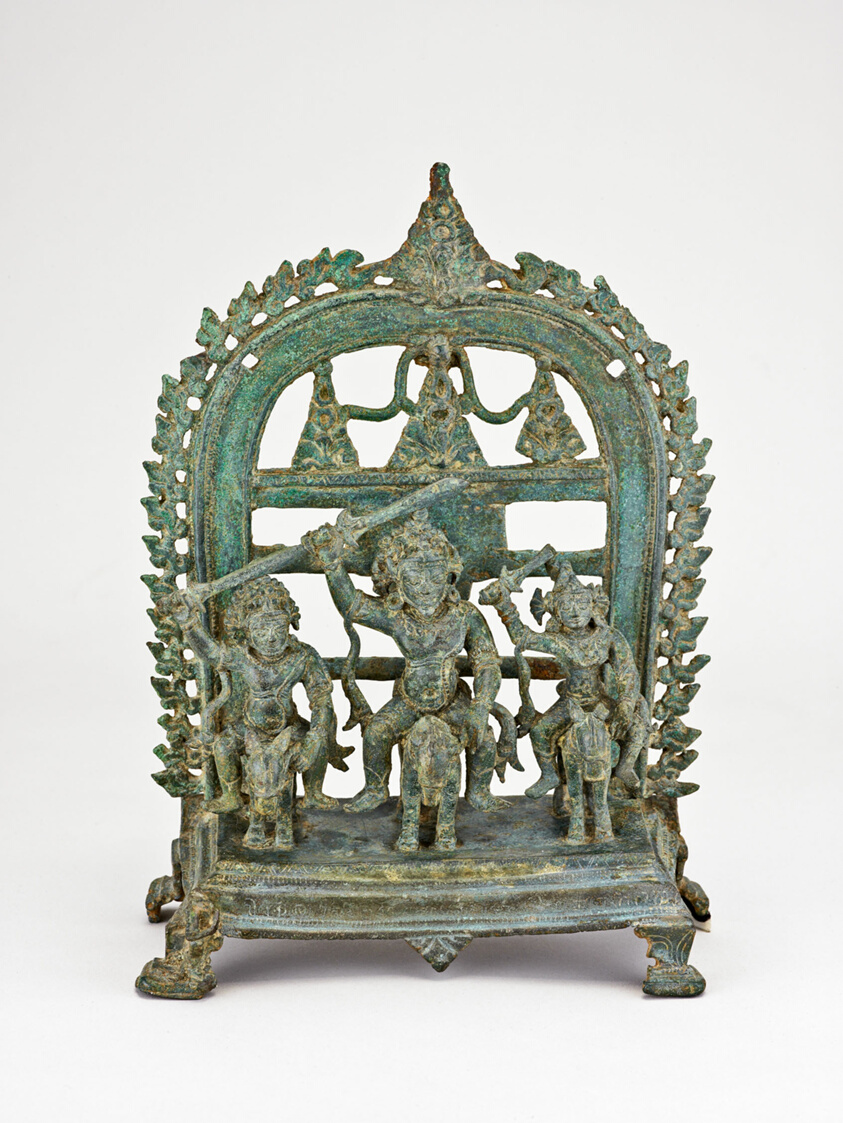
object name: Sculpture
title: Revanta, Son of Sun God Surya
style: South Asian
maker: Bangladesh; Rajshahi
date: c. 10th century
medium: Bronze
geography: Bangladesh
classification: bronze; metal; sculpture; asian art